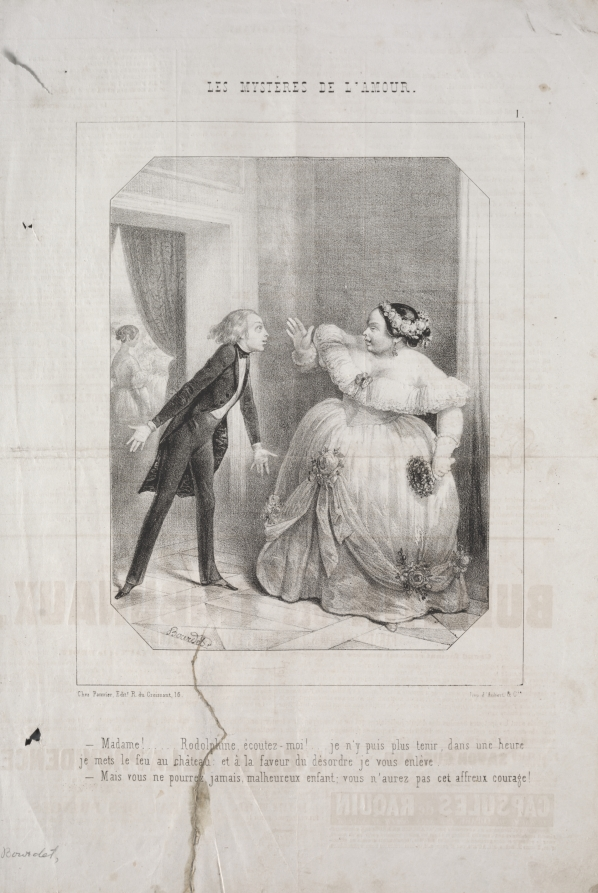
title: Les Mystères de l'amour: No. 1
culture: France, 19th century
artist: Joseph Guillaume Bourdet (French, 1799–1869)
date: c. 1843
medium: lithograph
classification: Print